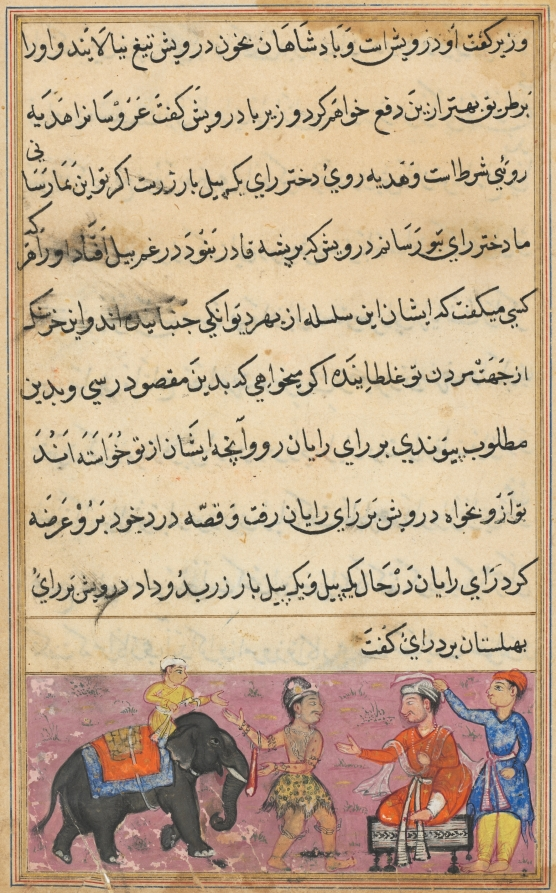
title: The dervish brings in as dowry an elephant laden with gold, from a Tuti-nama (Tales of a Parrot): Seventh Night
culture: Mughal India, court of Akbar (reigned 1556–1605)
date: c. 1560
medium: gum tempera, ink, and gold on paper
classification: Painting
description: The eccentric dervish, wearing a fur cap, a leopard-skin skirt, and chains around his neck, chest, and legs, comes to the king with the very thing the king thought he could never provide: an elephant laden with gold in exchange for the princess’s hand in marriage. The dervish had gone to the magnanimous King of Kings—the overlord of this local king—with his plight: in order to marry the princess, he had to provide an elephant laden with gold as a dowry. The King of Kings, who could not resist a good love story, provided it for him. The text of the story is written in Persian in a naskh script, which is read from right to left.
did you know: This painting is attributed to the same unnamed artist who painted folio 27r (CMA 1962.279.27.a).